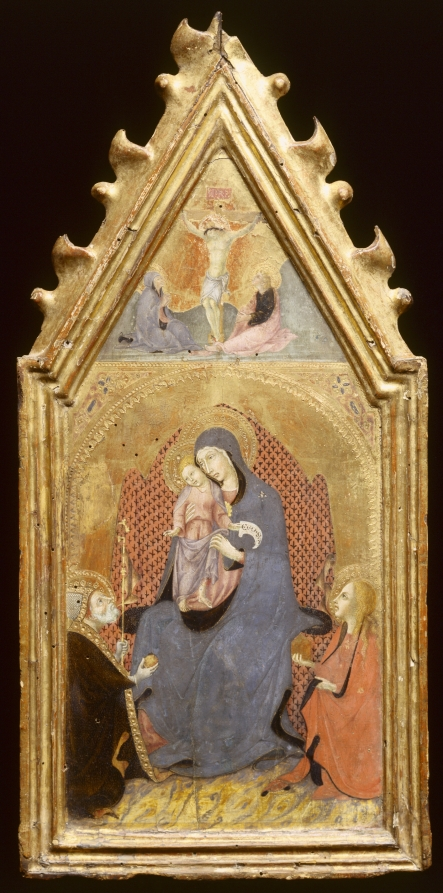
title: Virgin and Child Adored by Saints Mary Magdalene and Nicolas of Bari; Christ Crucified with the Virgin and Saint John the Evangelist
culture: Italy, Siena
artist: Sano di Pietro (Italian, 1406–1481)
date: 1400s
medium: tempera and gold on wood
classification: Painting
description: The artist covered the sides and reverse of this panel with a thin layer of gesso (a type of plaster), allowing the texture of the rough wood to remain visible. He then painted it to resemble porphyry, a beautiful and valuable stone.